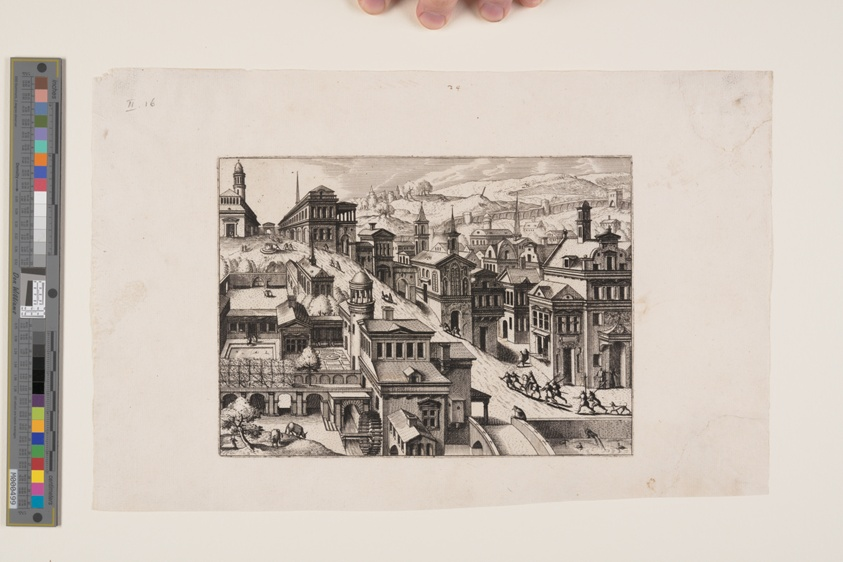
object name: Print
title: Bird’s-eye view of a town with a street going uphill from bottom right to top left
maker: Johannes van Doetecum (Netherlandish, 1528/32–1605) and Lucas van Doetecum (Dutch, died before 1584); after Hans Vredeman de Vries (Netherlandish, 1527-1604)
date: 1562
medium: Engraving on ivory laid paper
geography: Netherlands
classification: engraving; paper; print; prints and drawing